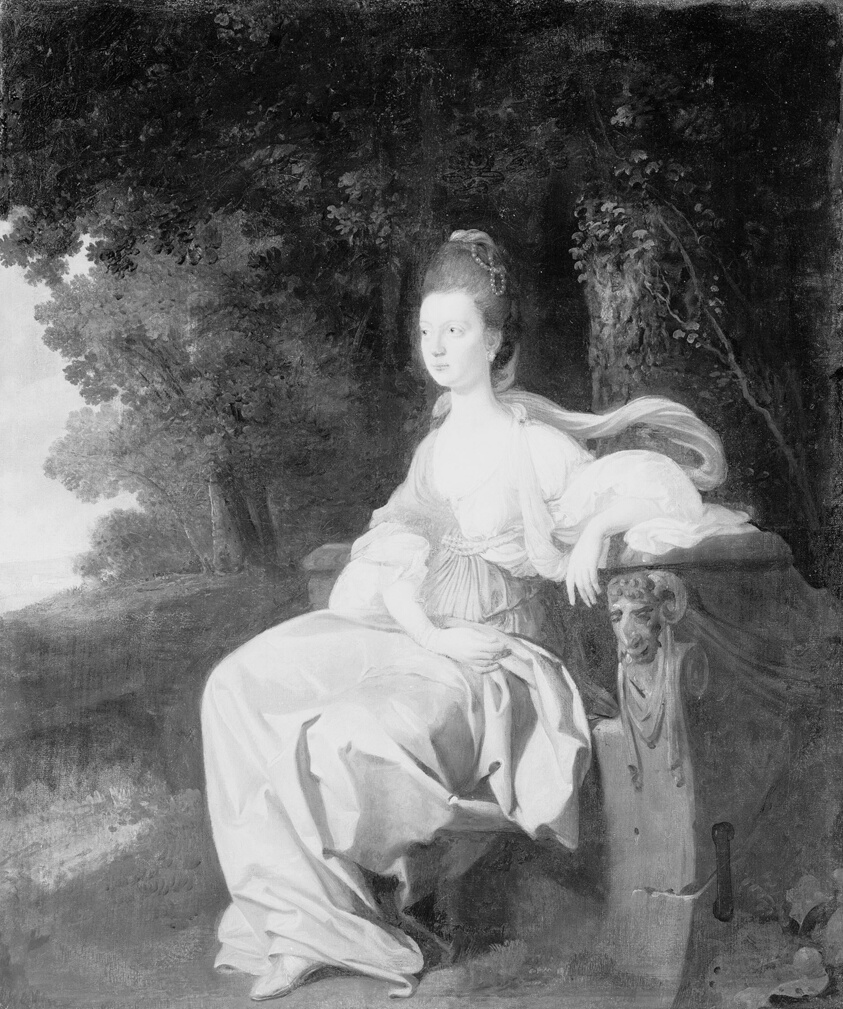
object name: Painting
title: Portrait of a Lady, Possibly of the Stanley Family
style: 18th Century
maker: Artist unknown (British, active 18th century)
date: c. 1780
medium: Oil on canvas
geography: England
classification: oil on canvas; british; oil paintings (visual works); paint; painting; european painting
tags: portraits: female subject, portrait, women, trees, pearls, landscape, luxury, wealth, woman